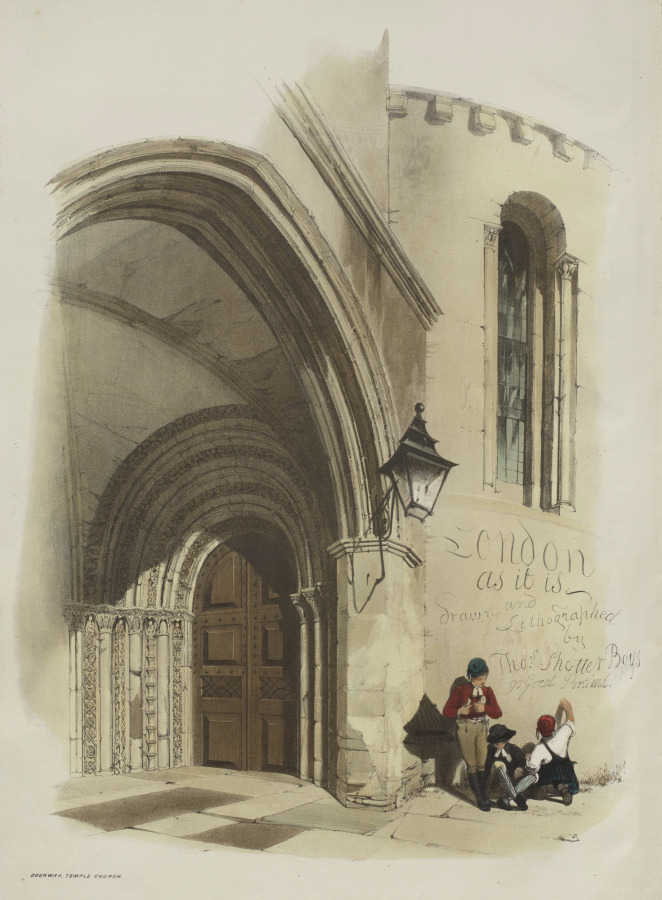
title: London As It Is: Doorway, Temple Church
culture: England, 19th century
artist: Thomas Shotter Boys (British, 1803–1874)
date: 1842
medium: lithograph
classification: Bound Volume